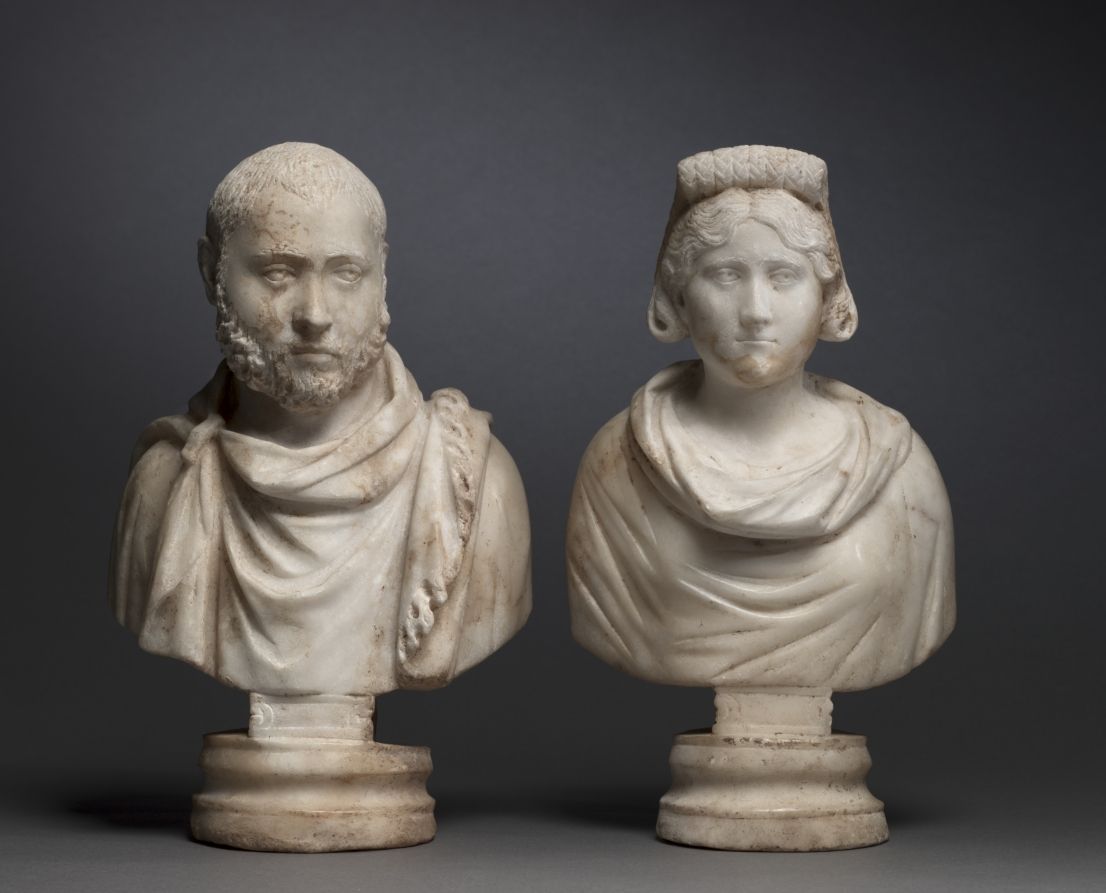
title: Portrait Bust of an Aristocratic Woman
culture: Anatolia, late Roman-early Christian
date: 280–90 CE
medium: marble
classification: Sculpture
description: These three pairs of marble portrait busts depict an aristocratic Roman couple. They are unique in representing the same couple three times with only minor variations in costume. Allegedly found together with the Jonah Marbles, they may represent the Christian patrons who commissioned the Jonah cycle.